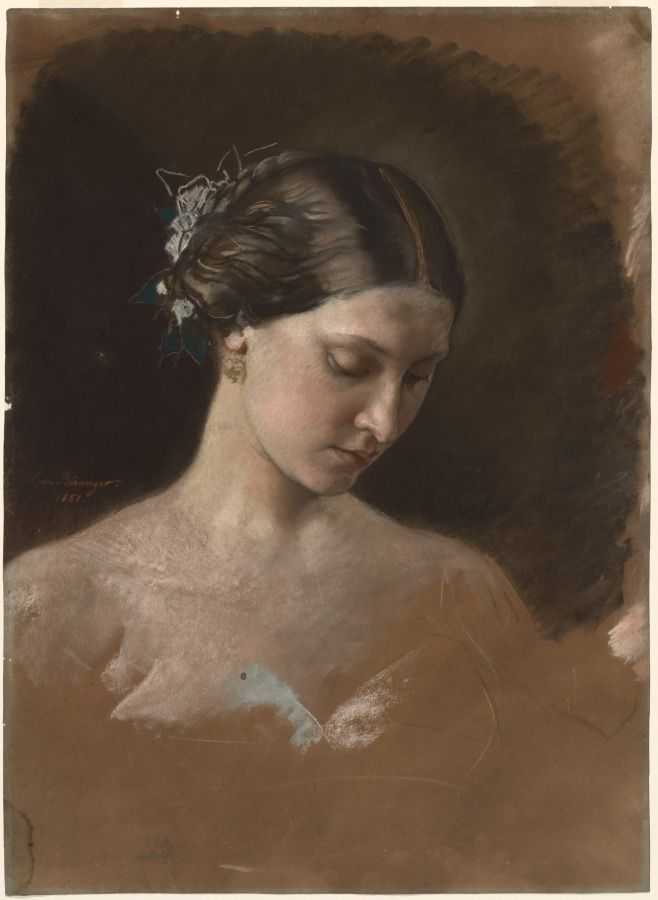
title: Portrait of a Woman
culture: France, 19th century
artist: Jean-Baptiste-Antoine-Emile Béranger (French, 1814–1883)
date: c. 1889–1899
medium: pastel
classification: Drawing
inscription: inscribed in orange pastel, center left: "Em. Béranger./ 1851"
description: Béranger is known as an academic painter of genre subjects. This pastel study of a young woman with downcast eyes conveys a sense of vitality and immediacy lacking in his more highly finished works in oil. While the graceful features of her face are articulated with tender detail, the flowers adorning her hair are summarily indicated with a handful of rapid strokes, and her bodice is barely suggested.